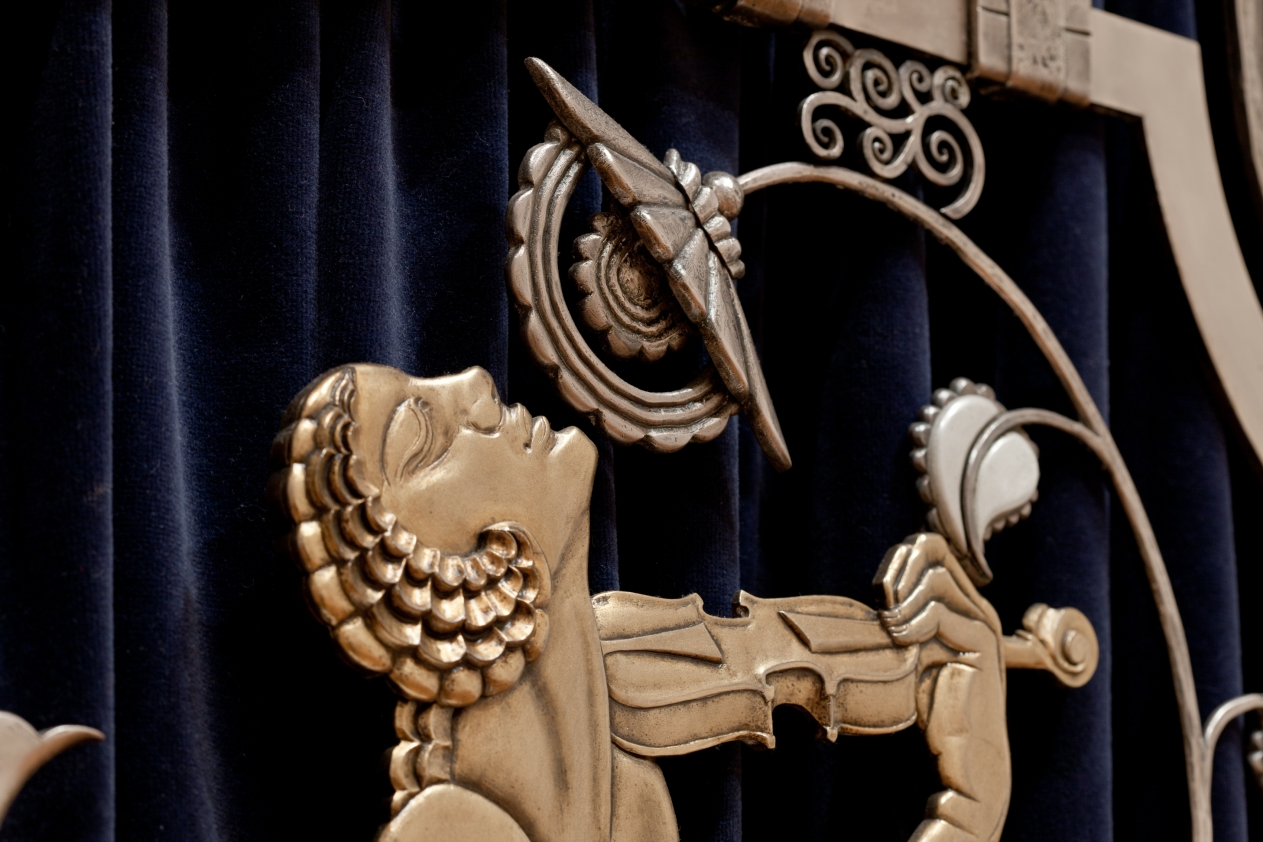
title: Muse with Violin Screen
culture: America, Ohio, Cleveland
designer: Paul Fehér (American, born Hungary, 1898–1990)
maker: Rose Iron Works (America, Ohio, Cleveland, est. 1904)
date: 1930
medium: Steel, brass; silver and gold plating, cotton velveteen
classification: Metalwork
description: Since the early years of the 20th century, the Rose Iron Works, a Cleveland supplier of architectural ornament, has produced distinguished metalwork. The company’s founder, Martin Rose, was born in Austria-Hungary and studied ornamental metalsmithing in Vienna prior to immigrating to Cleveland in 1902. In the 1920s, he hired a talented young Parisian designer, Paul Fehér, to work for the firm. Fehér’s designs, culminating in this massive screen, brought a modern European sensibility to the Rose Iron Works production. With its geometric patterning, highly stylized and abstracted natural forms, and the central figure reminiscent of the celebrated jazz singer Josephine Baker, this screen reflects the classic motifs of Art Deco design.